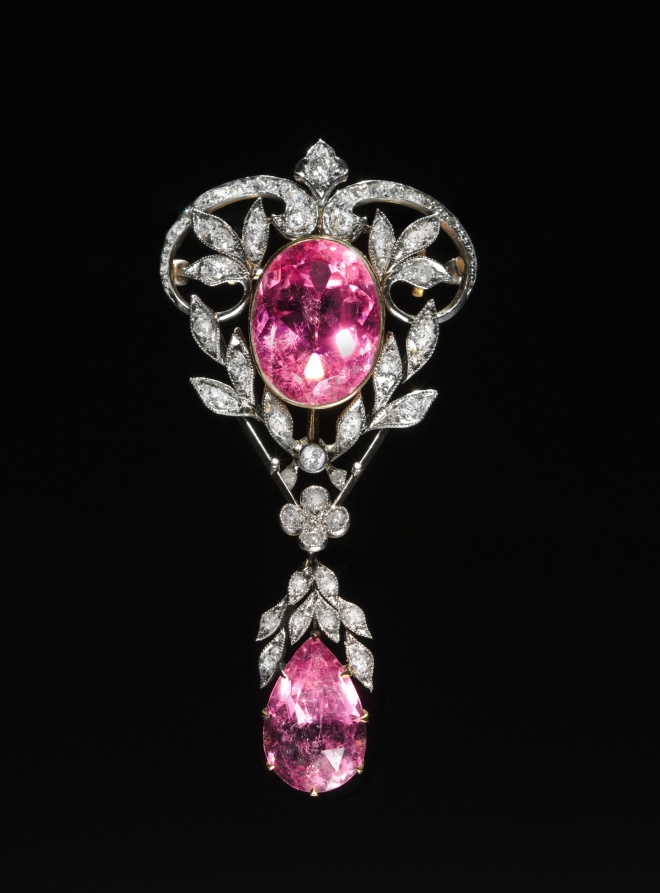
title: Pendant Brooch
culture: America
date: c. 1890–1910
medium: pink tourmaline, diamonds, gold, platinum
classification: Jewelry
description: Brightly colored gemstones, paired with diamonds, were quite fashionable during the Gilded Age because of their ability to coordinate well with the myriad colors of silk fabric used to make formal dresses at the time. They were also prized for their size and depth of color. This pendant brooch provides a traditional setting typical of the period in which two large tourmalines are surrounded by a halo of white diamonds.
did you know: Around 1900, pink tourmalines were most often found in Maine and California.